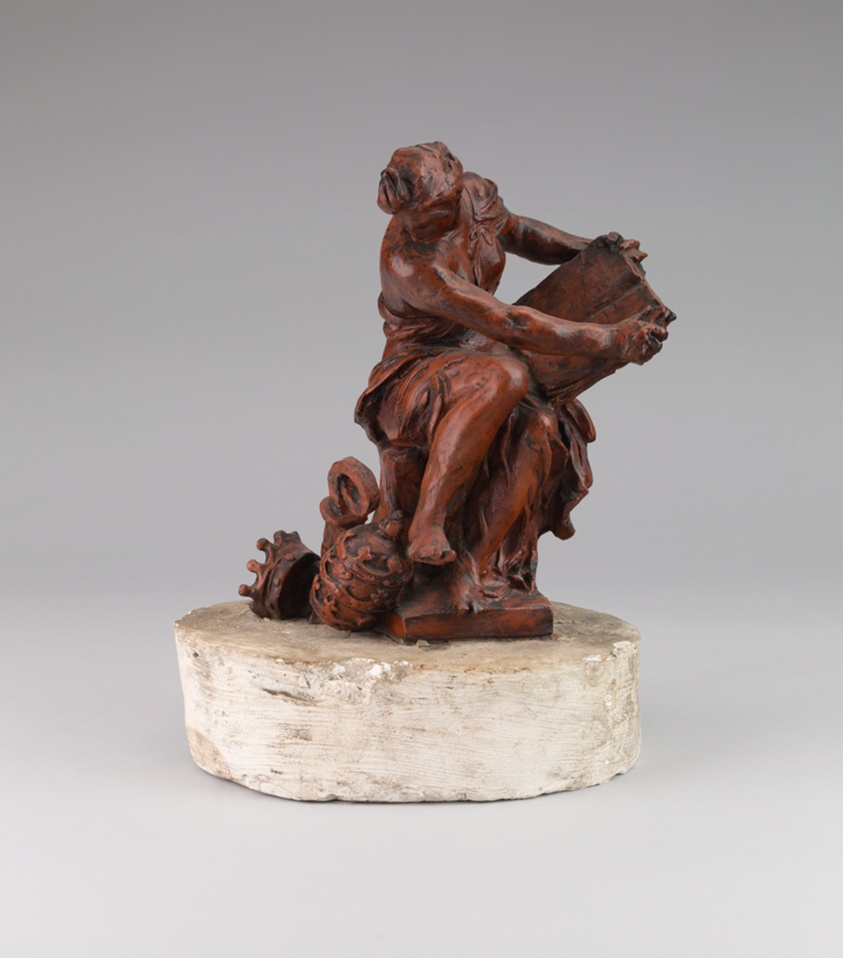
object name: Sculpture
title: Science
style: nineteenth century, 19th century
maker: Aimé-Jules Dalou (French, 1838-1902)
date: c. 1886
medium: Wax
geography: France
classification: statuette; french; sculpture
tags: science, woman, figure, crowns, book